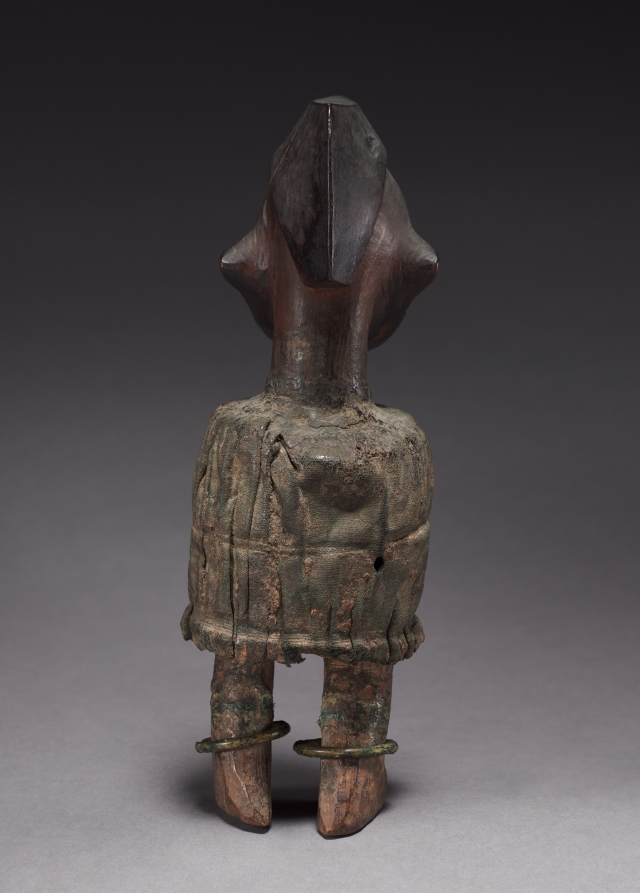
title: Male Figure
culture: Africa, Central Africa, Republic of the Congo or Democratic Republic of the Congo, Teke-style maker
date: late 1800s-early 1900s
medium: Wood, cloth, organic material, and copper alloy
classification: Sculpture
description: This figure was the Delennes' first African art acquisition. They purchased the work in Paris in 1958—the year they were married—from the then leading French dealer Henri Kamer. The couple's interest in African art, which also inspired this particular acquisition, was triggered by their visit to the Congolese pavilion at the Brussels world's fair that same year. This experience made a lasting impression and triggered a lifelong appreciation for the art of what was then still the Belgian Congo. Although Odette later admitted that she knew that this figure was not the best example of Teke art, she and her husband held on to it because it served as a personal souvenir of their meeting each other.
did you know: This figure was the Delennes' first African art acquisition; it symbolized Rene and Odette’s first meeting.